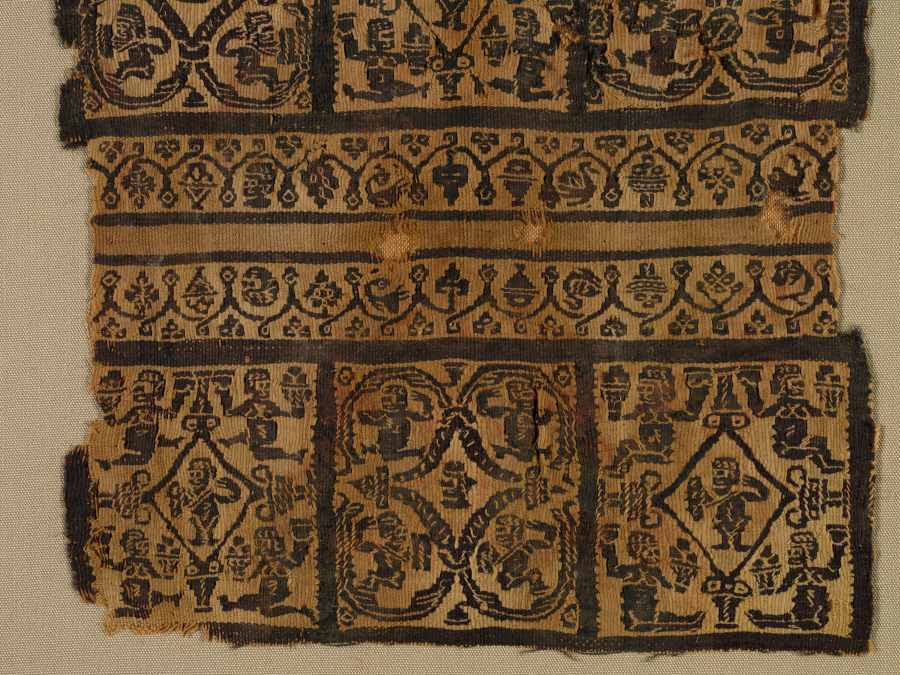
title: Fragment, Sleeve Ornament from a Tunic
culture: Egypt, Byzantine period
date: 500s - early 600s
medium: tapestry (probably originally inwoven in tabby ground); wool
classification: Textile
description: This fragment originally decorated a tunic, the prevalent garment worn by adults and children around the Byzantine Mediterranean. Six square panels feature stylized human figures in various states of movement. With baskets and vessels in hand, they sit, stand, and leap within the scenes. Separating the square panels in the middle, two decorative bands depict alternating stylized figural busts, birds, baskets, and vegetal motifs. Tunic decoration such as this provided wearers a way to express their social status through clothes.